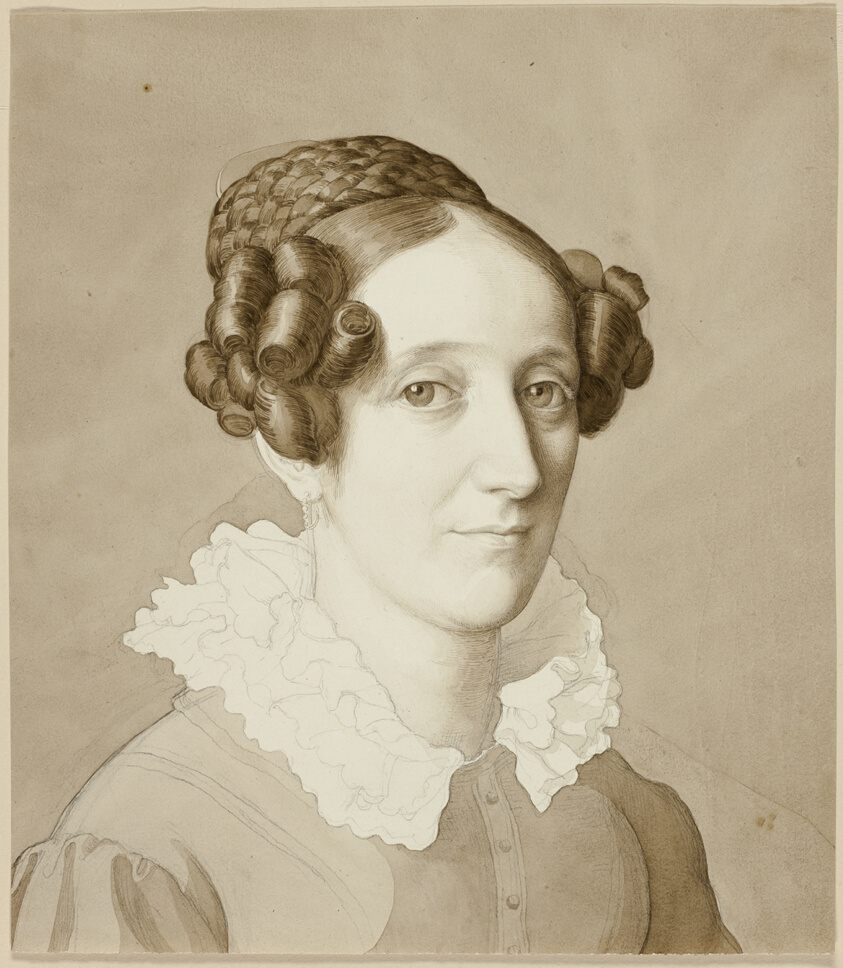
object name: Drawing and Watercolor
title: Portrait of a Woman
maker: Julius Schnorr von Carolsfeld (German, 1794-1872)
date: 1821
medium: Brush and brown wash and pen and brown ink, with graphite on ivory wove paper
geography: Germany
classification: prints and drawing; graphite; pen and ink drawings; brush and wash; drawings (visual works)